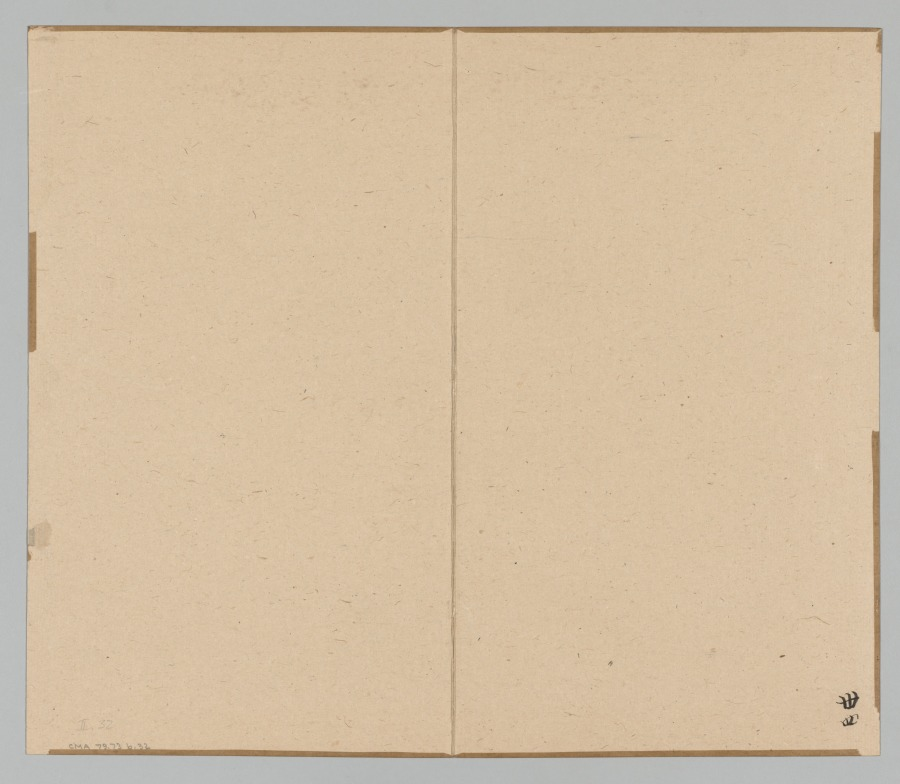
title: Reverberations of Taiga, Volume 2 (leaf 32)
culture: Japan, Edo period (1615–1868)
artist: Aoki Shukuya (Japanese, d. 1802)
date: mid- to late 1700s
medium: double-leaf from a pair of albums; ink and light color on paper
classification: Portfolio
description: Traditionally, young painters in Japan began their studies with an established master-painter. The master's compositions invariably became models that the apprentice copied to learn various ink and brush techniques. Shukuya was a pupil of the famous Kyoto artist Ikeno Taiga, whose style is reflected in these sketches of rocks, trees, and mountains.